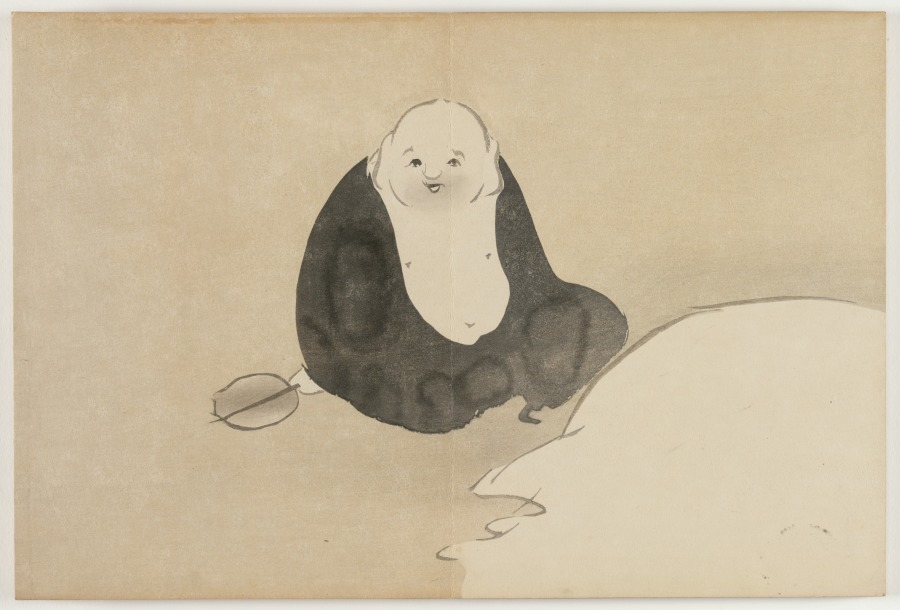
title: Flowers of a Hundred Worlds (Momoyogusa): Hotei (Hotei)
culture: Japan, Meiji period (1868–1912)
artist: Kamisaka Sekka (Japanese, 1866–1942)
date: 1909–10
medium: color woodcuts with gold and silver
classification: Bound Volume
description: This print from a set of three woodblock printed albums displays the graphic design prowess of Kamisaka Sekka. The images were first distributed one by one to subscribers to the series but later were reissued in bound form, like this book, for mass consumers. Each print features a vignette taken from nature or Japanese literature. Many of the scenes have a long history in Japan, originating in the 900s or 1000s and having been interpreted by all manner of artists since that time. Sekka’s selections hew closely to precedents from the Rinpa style originated by painter Tawaraya Sōtatsu (c. 1570–c. 1640) and calligrapher Hon’ami Kōetsu (1558–1637).